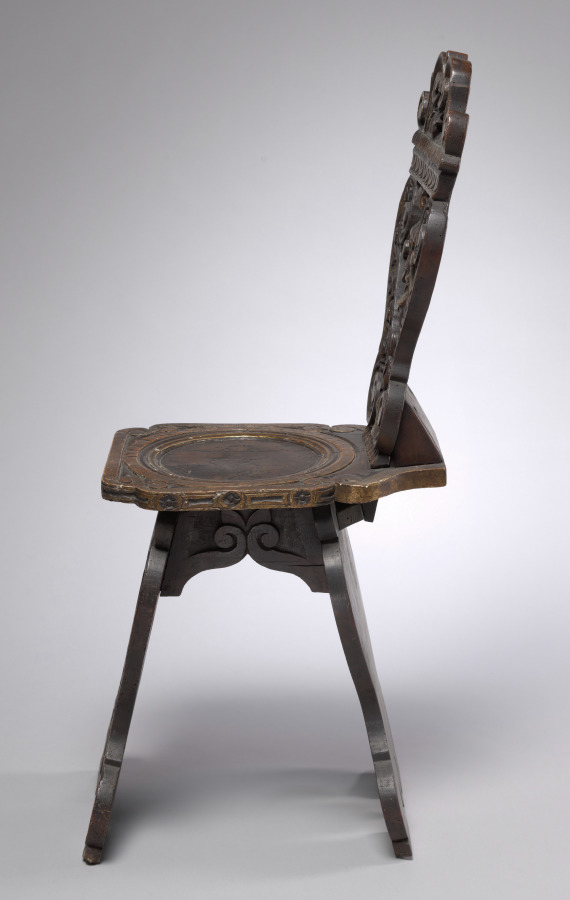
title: Chair, Sgabello type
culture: Italy, late 16th century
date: late 1500s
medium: walnut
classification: Furniture and woodwork